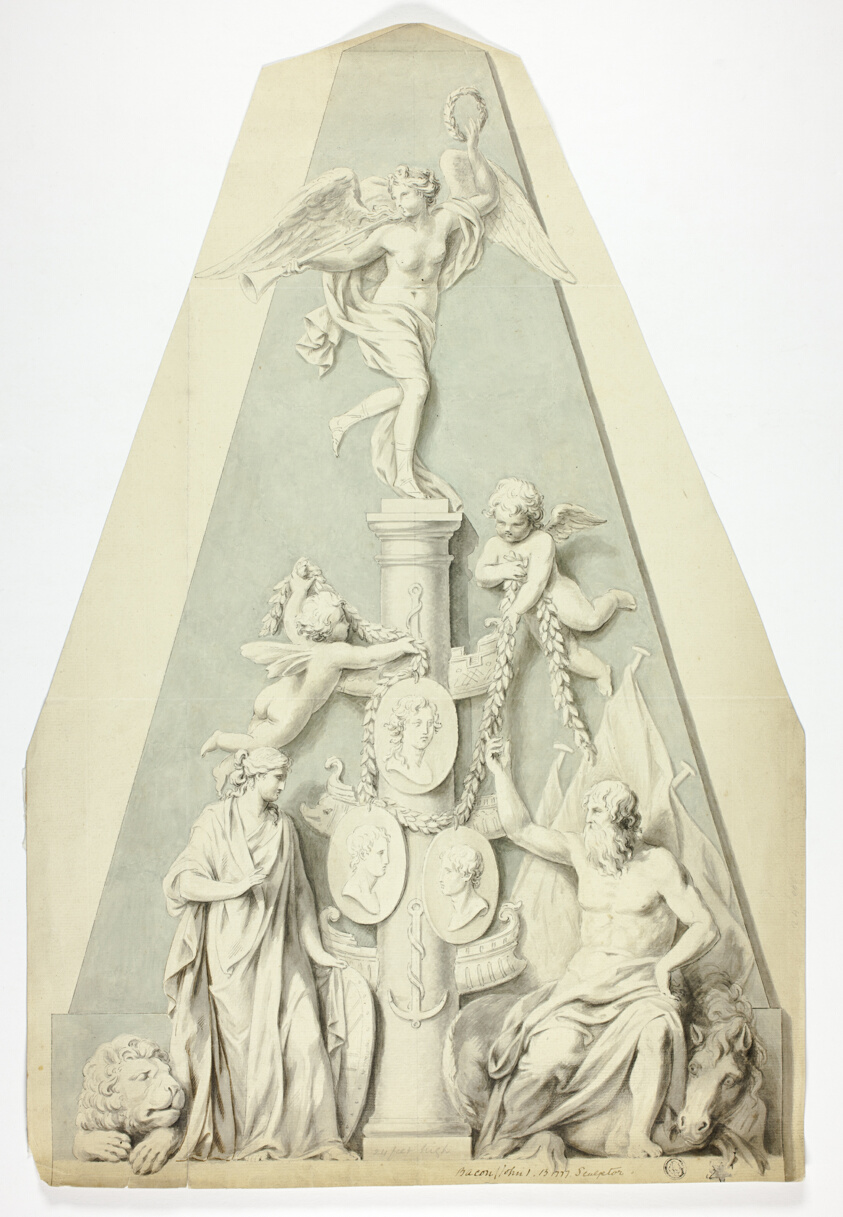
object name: Drawing and Watercolor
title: Design for a Monument to Sailors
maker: John Bacon, the younger (English, 1777-1859)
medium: Pen and black and brown ink and brush and gray and blue wash, with touches of black chalk, over traces of graphite, on ivory laid paper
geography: England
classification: ink or chalk wash; pen and ink drawings; brush and wash; paper; drawings (visual works); prints and drawing